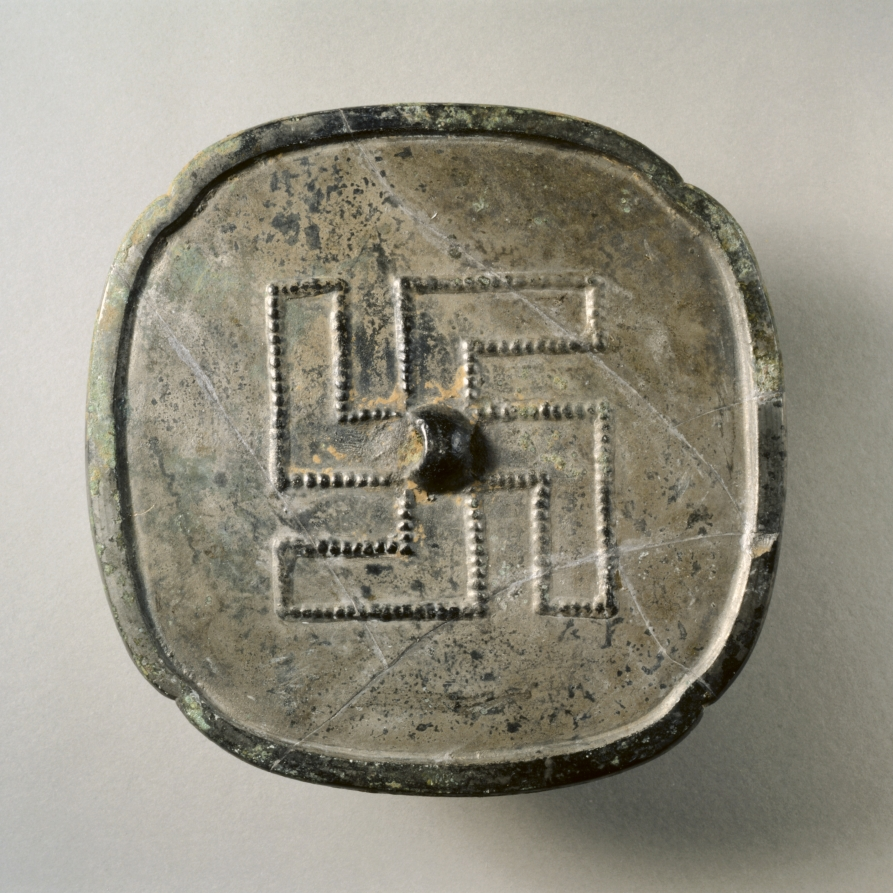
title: Quadrilobed Mirror with Wan Symbol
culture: China, Tang dynasty (618-907)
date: 700s-800s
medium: bronze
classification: Metalwork